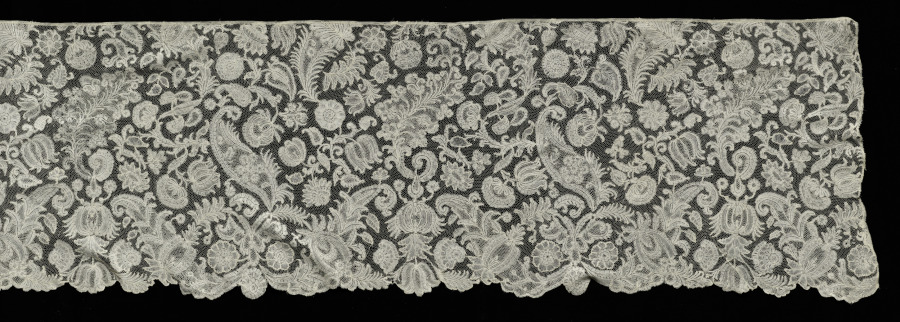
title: Lace Edging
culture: Belgium, Brussels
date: 1700s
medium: Linen: bobbin lace (Point d'Angleterre)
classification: Lace